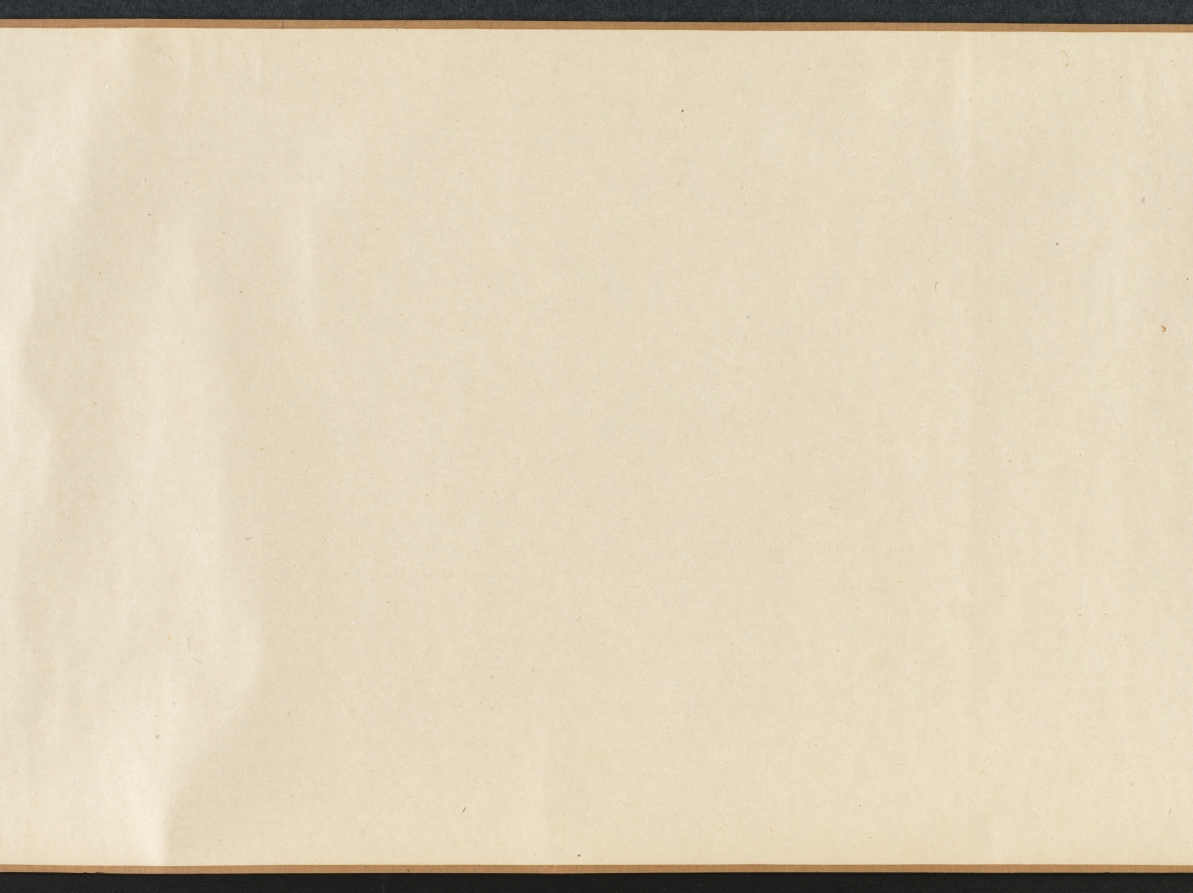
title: Landscape with Bamboo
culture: China, Yuan dynasty (1271-1368)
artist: Song Ke (Chinese, 1327–1387)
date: 1300s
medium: Handscroll; ink on paper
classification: Painting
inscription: 東吳宋克戲為仲幾畏友圖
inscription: 2 colophons and 14 additional seals: 1 seal of Yü Chung-chi (14th c.); 1 seal of Wu Ch'eng (1469 jinshi); 1 colophon and 2 seals of Wu K'uan (1435–1504); 1 colophon and 9 seals of Cheng Qi (1911–1988); 1 seal unidentified.